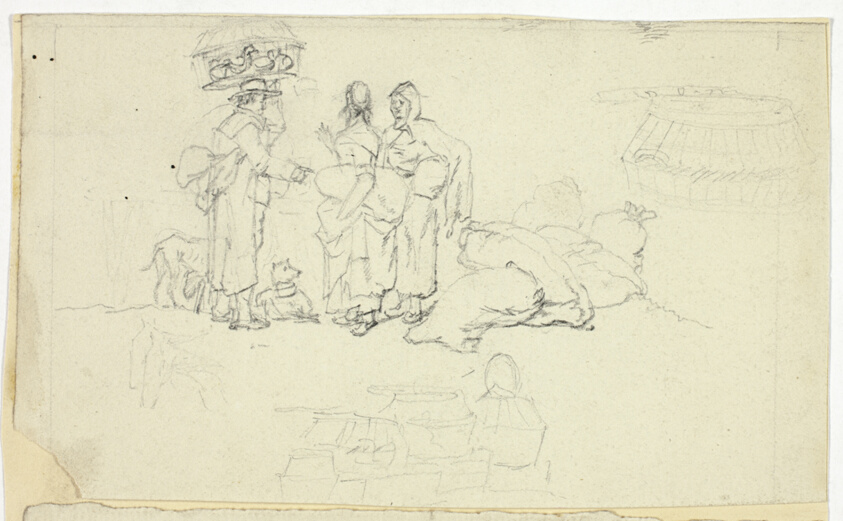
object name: Drawing and Watercolor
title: Figures with Market Goods and Three Sketches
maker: William Henry Pyne (English, 1769-1843)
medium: Graphite on ivory wove paper, tipped onto cream wove paper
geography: England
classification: graphite; drawings (visual works); prints and drawing